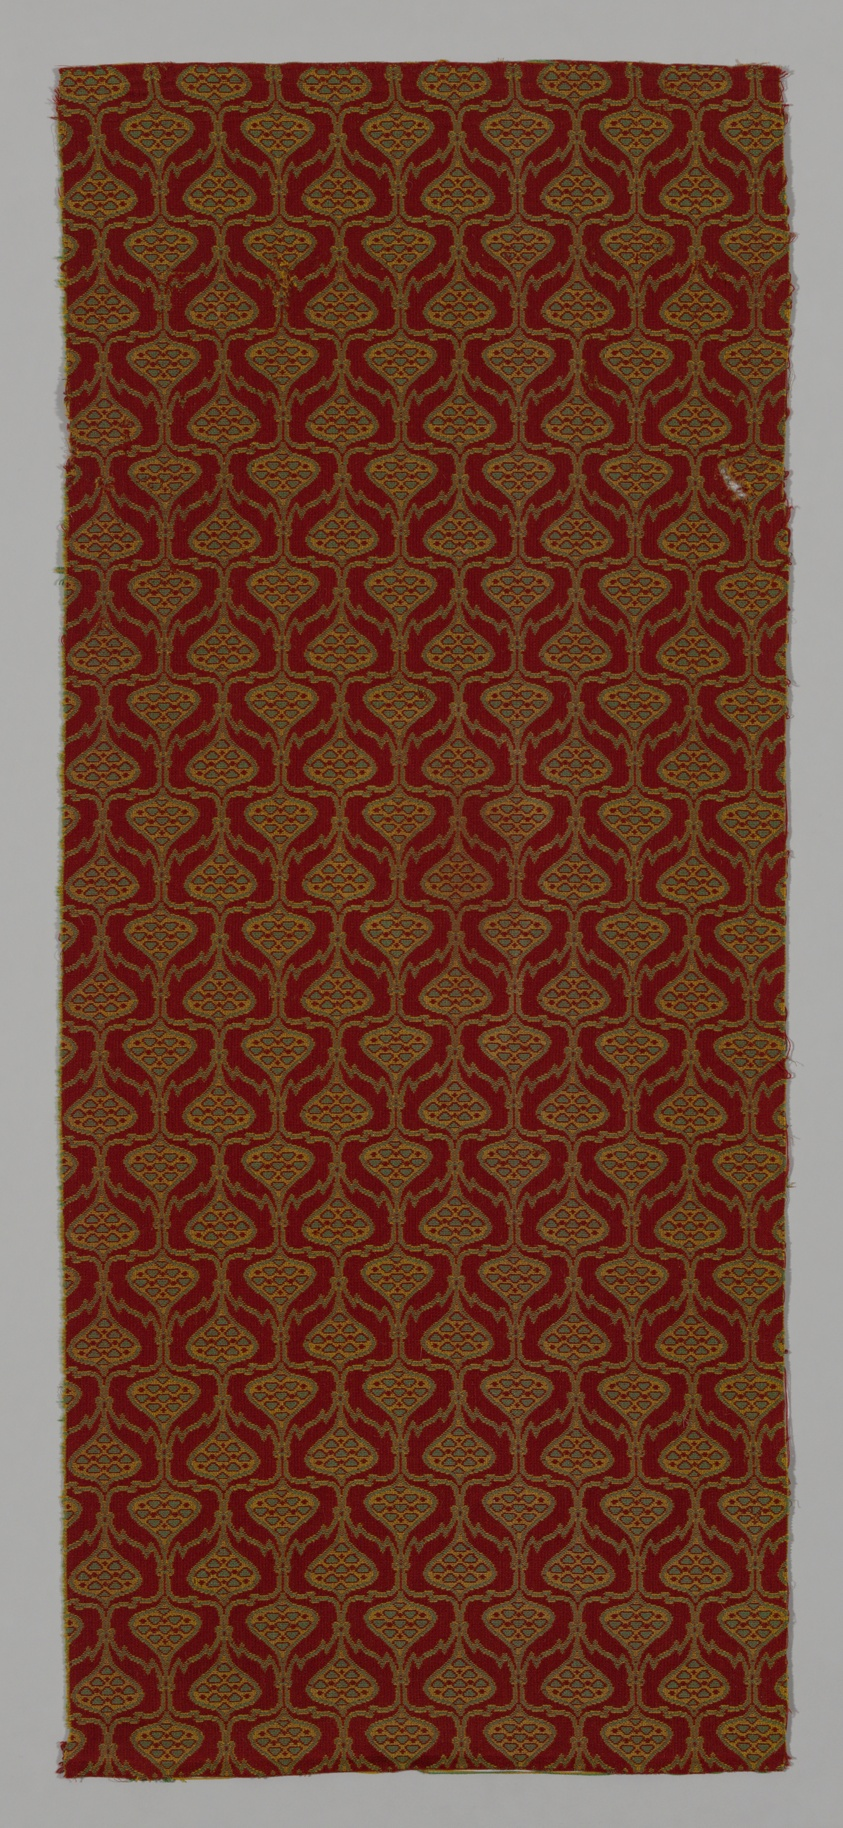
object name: Textile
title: Panel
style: Arts and Crafts Movement, british, 19th century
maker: Designed by Arthur Heygate Mackmurdo (English, 1851–1942); England, London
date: c. 1886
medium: Cotton and wool, warp-faced plain weave with supplementary patterning wefts tied by supplementary binding warps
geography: London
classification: textile; weaving